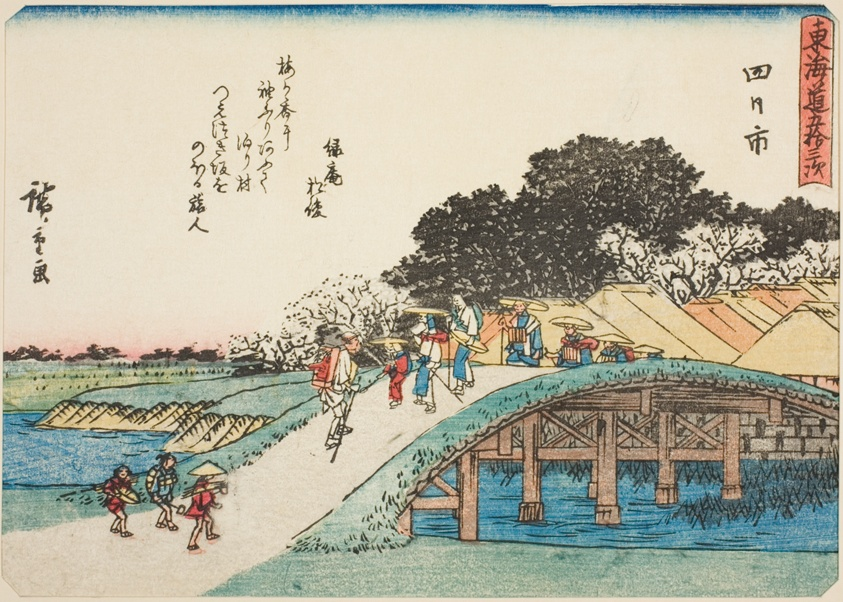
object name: Print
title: Yokkaichi, from the series "Fifty-three Stations of the Tokaido (Tokaido gojusan tsugi)," also known as the Tokaido with Poem (Kyoka iri Tokaido)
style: Japanese (culture or style)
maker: Utagawa Hiroshige 歌川 広重; Japanese, 1797-1858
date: c. 1837/42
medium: Color woodblock print; chuban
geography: Japan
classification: woodblock print; print; asian art